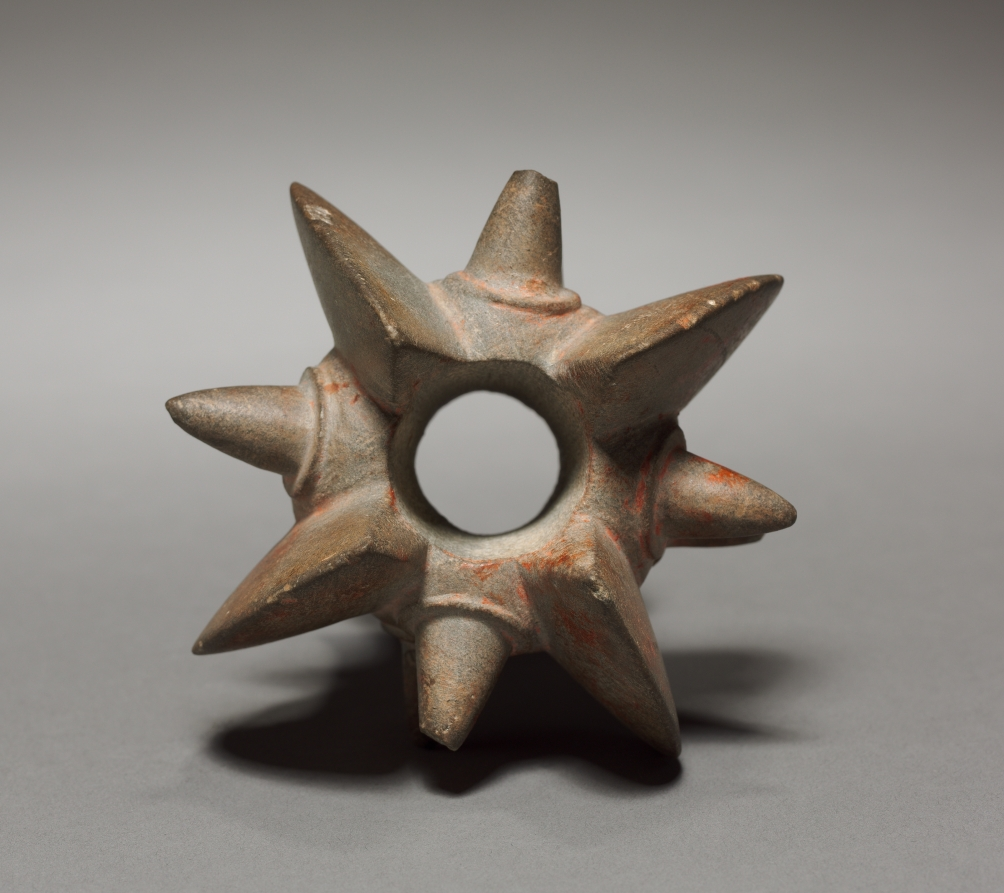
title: Mace Head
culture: North coast of Peru, Salinar culture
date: c. 200 BCE–100 CE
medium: stone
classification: Stone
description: This handsome object was slipped onto a wooden shaft to form a mace, a club-like weapon used in war. It is unclear, however, whether the ancients used examples as well carved as this one in anything but ceremonial circumstances.